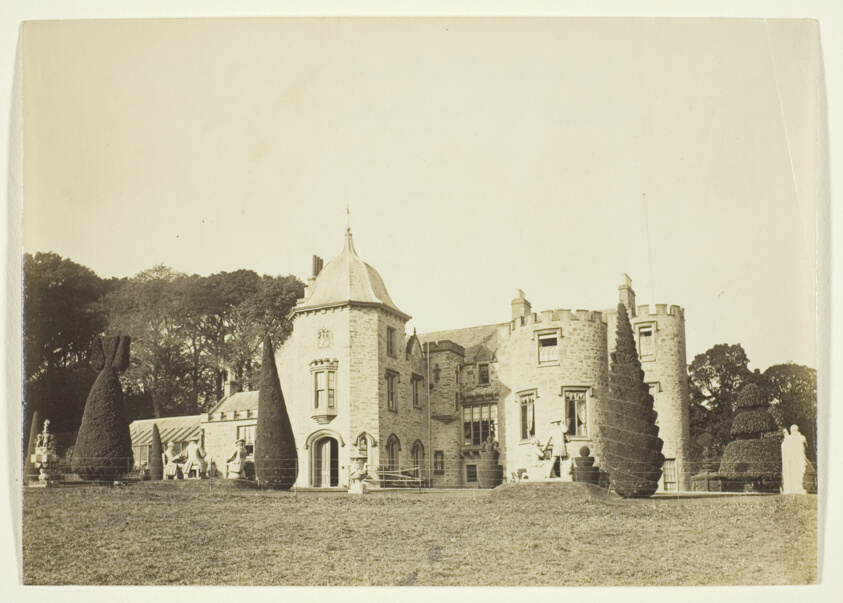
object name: Photograph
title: Untitled (The Corner House, built by Norman Shaw, side view)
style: 19th century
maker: Artist unknown; probably English, 19th century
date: 1869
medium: Albumen print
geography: England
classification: albumen silver print; photographic process; photography; photograph